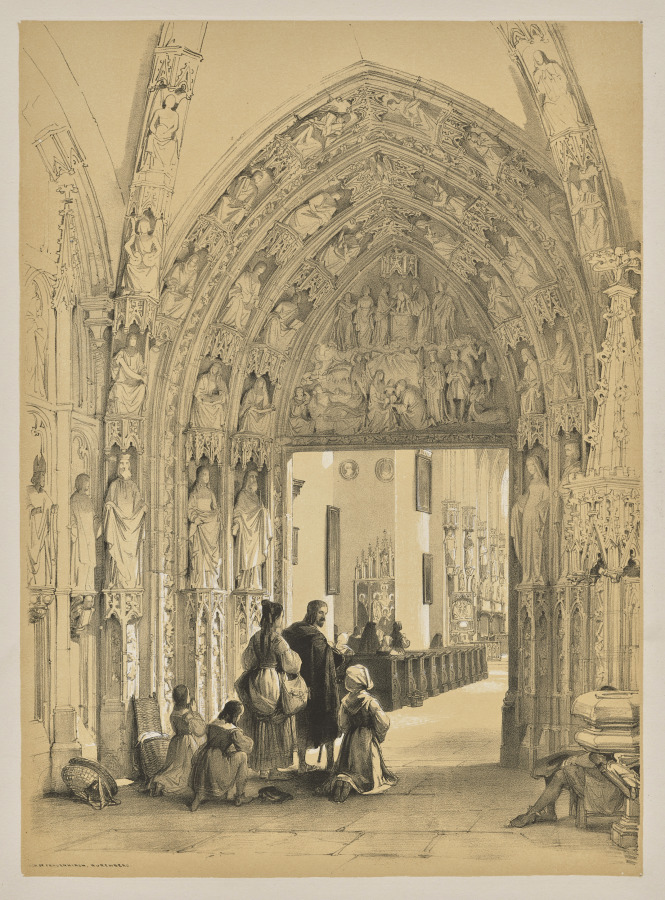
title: Sketches in Belgium and Germany, First Series, Porch of Frauenkirch, Nuremberg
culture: England, 19th century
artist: Louis Haghe (British, 1806–1885)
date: 1845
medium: lithograph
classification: Print